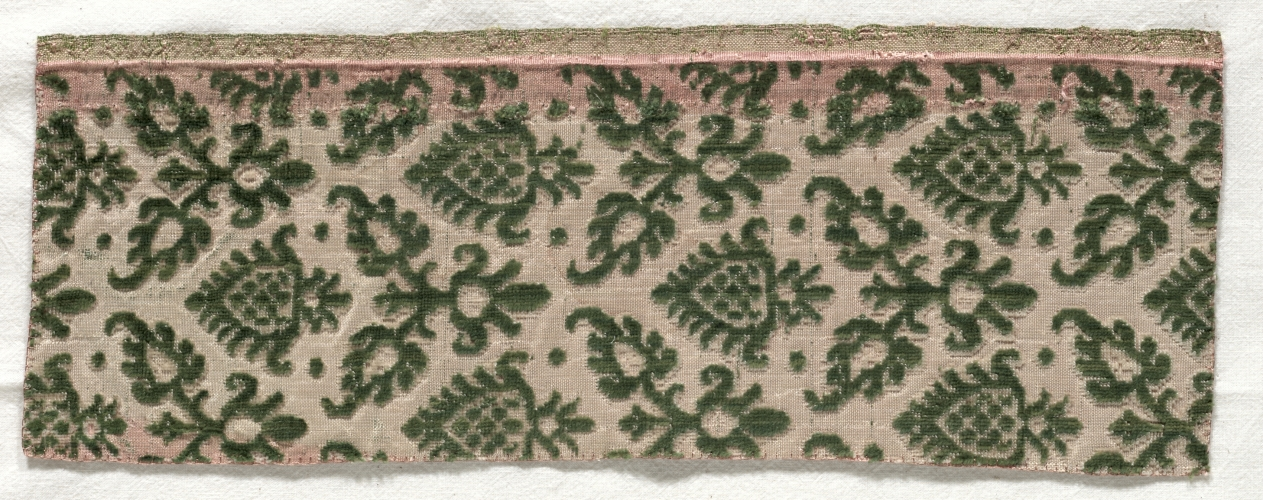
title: Velvet Fragment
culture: Italy, 16th century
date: 1500s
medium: velvet (cut and uncut); silk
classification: Velvet